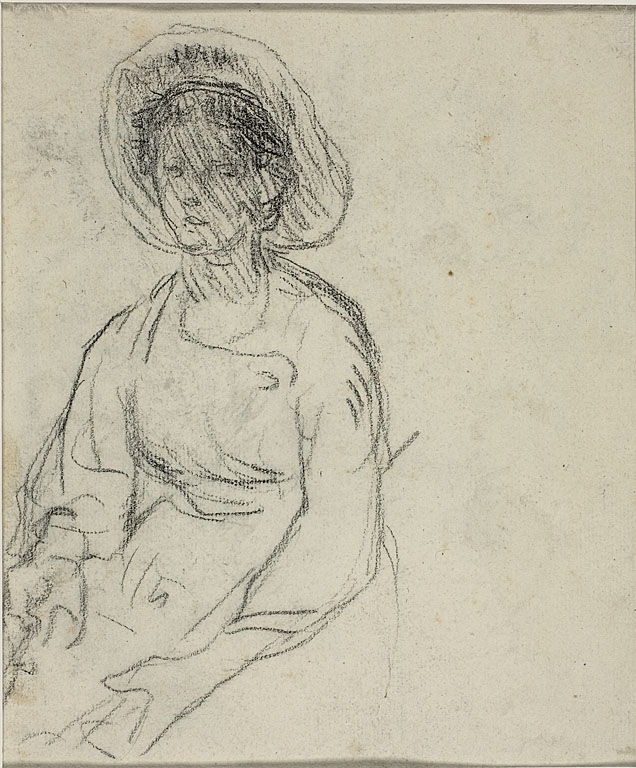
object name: Drawing and Watercolor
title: Two Studies of a Seated Peasant Woman (recto); Study of a Young Girl Wearing a Hat (verso)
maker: Jean François Millet (French, 1814-1875)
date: c. 1869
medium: Charcoal (recto), and black chalk (verso), on ivory laid paper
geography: France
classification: charcoal; drawings (visual works); prints and drawing